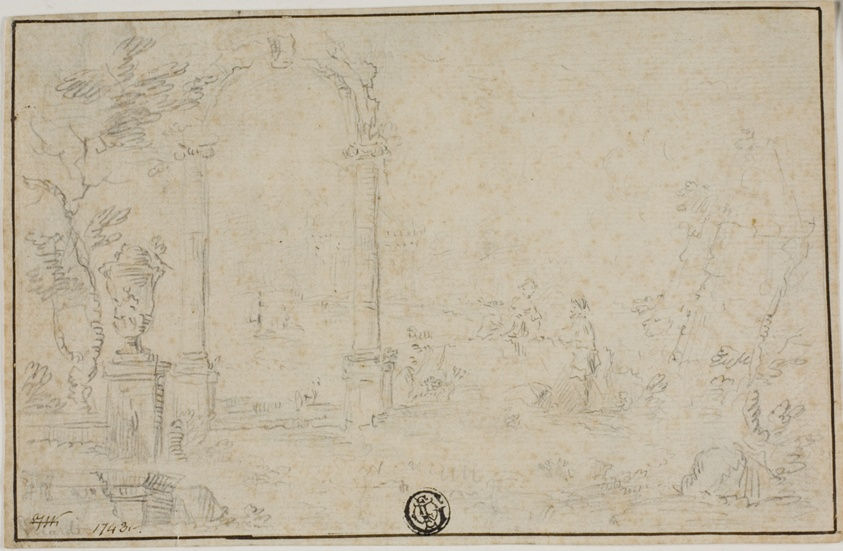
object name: Drawing and Watercolor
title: Ruins in a Park, Two Figures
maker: Style of Francesco Guardi (Italian, 1712-1793); or a follower of Claude Gillot (French, 1673-1722)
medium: Graphite on ivory laid paper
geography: Italy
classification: graphite; drawings (visual works); prints and drawing